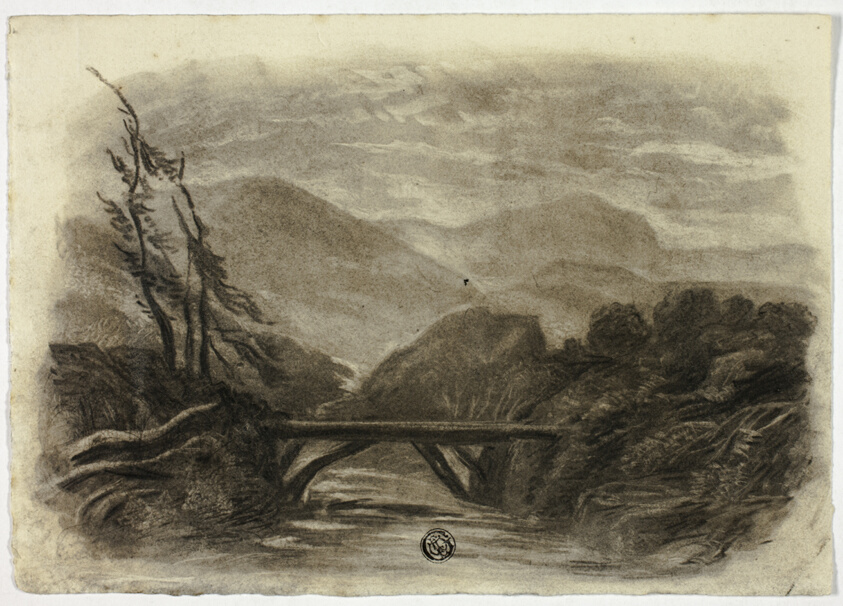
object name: Drawing and Watercolor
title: Mountain Stream with Small Bridge I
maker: Elizabeth Murray (English, c. 1815-1882)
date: c. 1855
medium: Charcoal with stumping and scraping on ivory wove paper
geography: England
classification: charcoal; drawings (visual works); prints and drawing